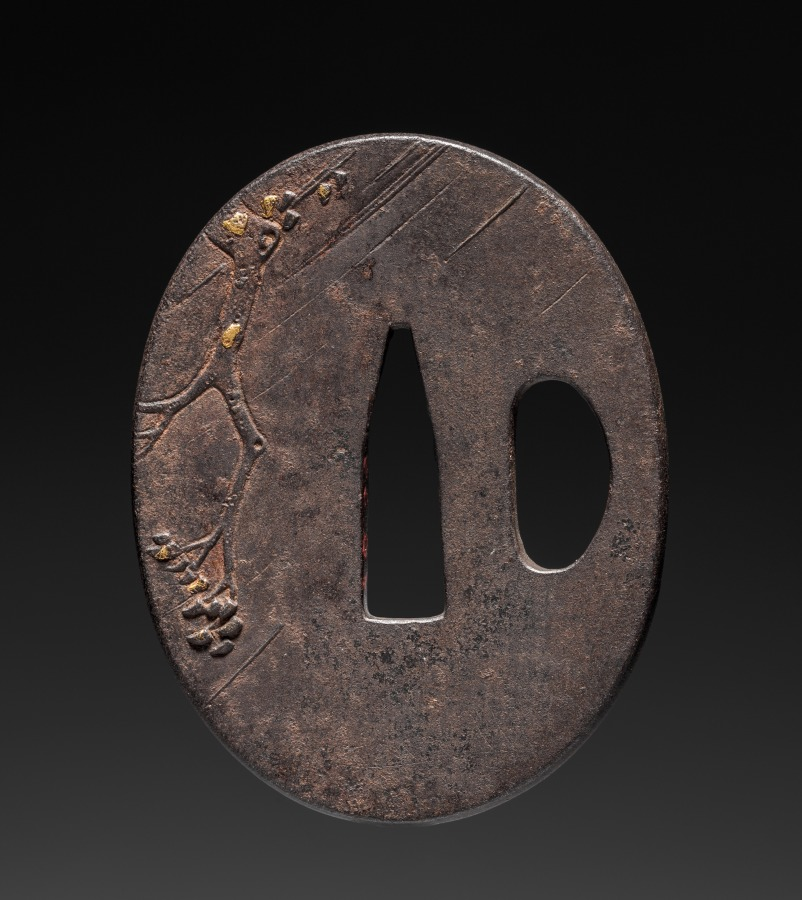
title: Sword Guard (Tsuba)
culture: Japan, possibly Edo period (1615-1868)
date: c. 1615–1868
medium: iron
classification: Arms and Armor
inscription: signed: 橘川之定